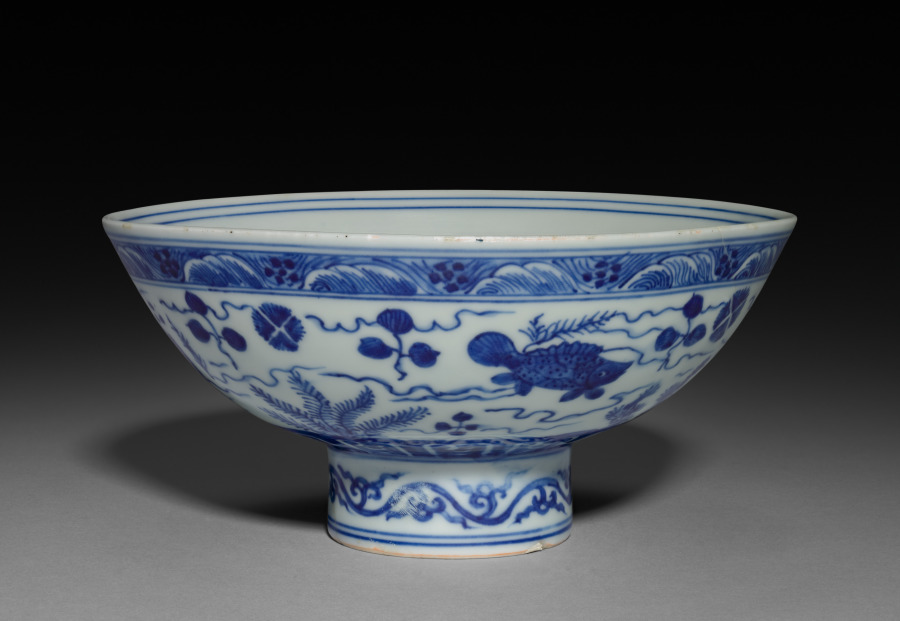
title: Bowl with Fish and Water Plants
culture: China, Jiangxi province, Jingdezhen kilns, Ming dynasty (1368-1644), Jiajing mark and reign (1522-66)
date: 1522–66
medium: porcelain with underglaze blue decoration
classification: Ceramic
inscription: 大明嘉靖年製